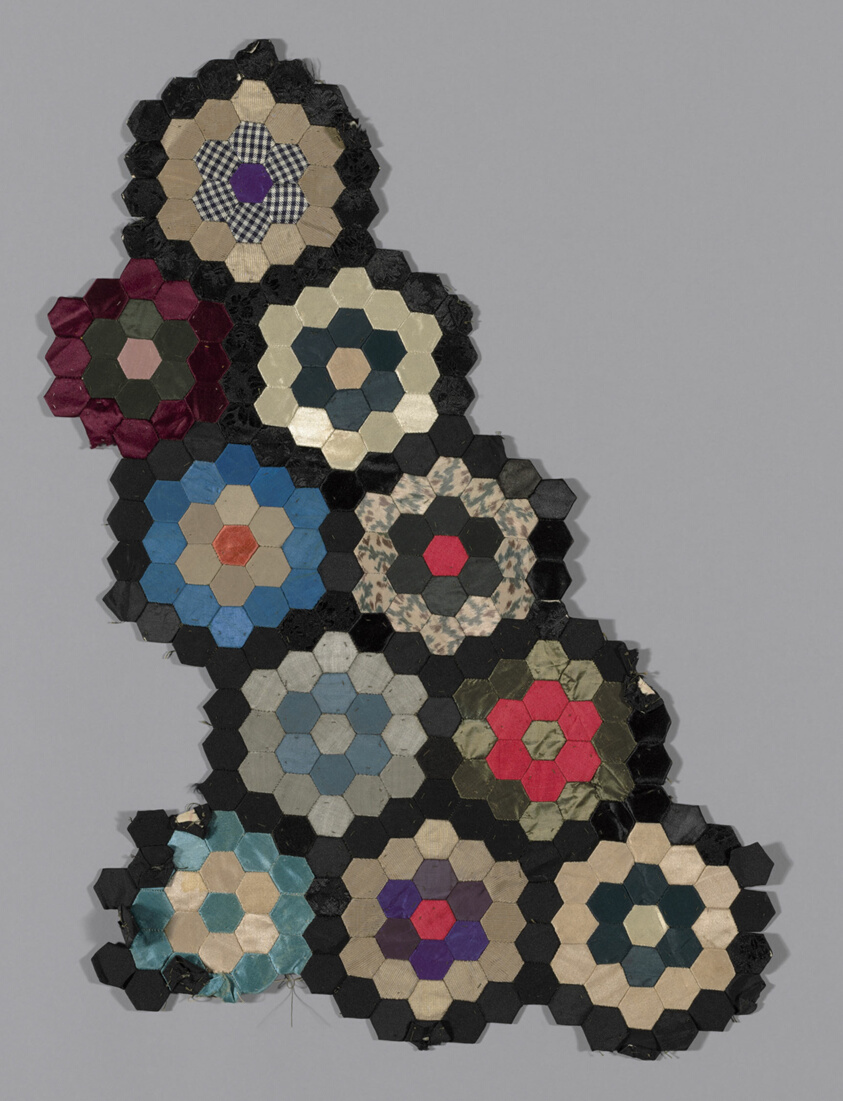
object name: Textile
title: Fragments from Bedcover (Mosaic or Honeycomb Quilt)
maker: United States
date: 1876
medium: a: Silk and cotton, plain, twill, and satin weaves, some with patterning warps, some with patterning and brocading wefts, some self-patterned, and some with cut solid velvet; some warp painted (chiné); pieced over paper b: silk, plain and satin weaves, some with self-patterning; some warp painted (chine); pieced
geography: United States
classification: textile; needlework - quilt